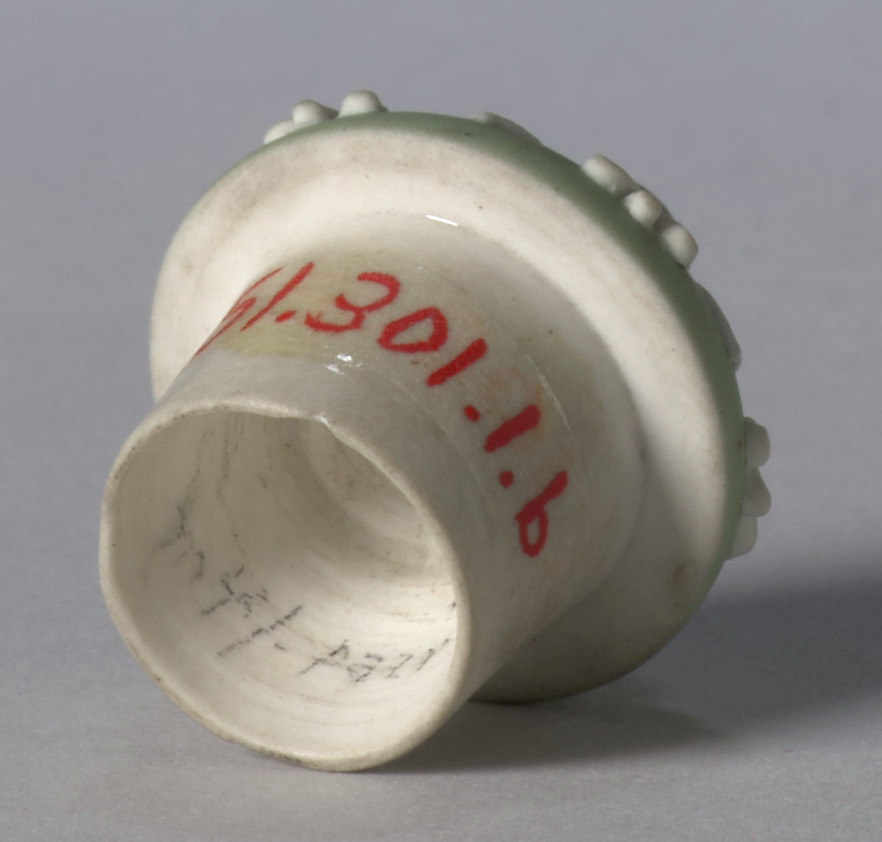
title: Cover for an Urn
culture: England, Staffordshire, late 18th-early 19th Century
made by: Wedgwood Factory (British)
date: c. 1800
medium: jasper ware with relief decoration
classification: Ceramic